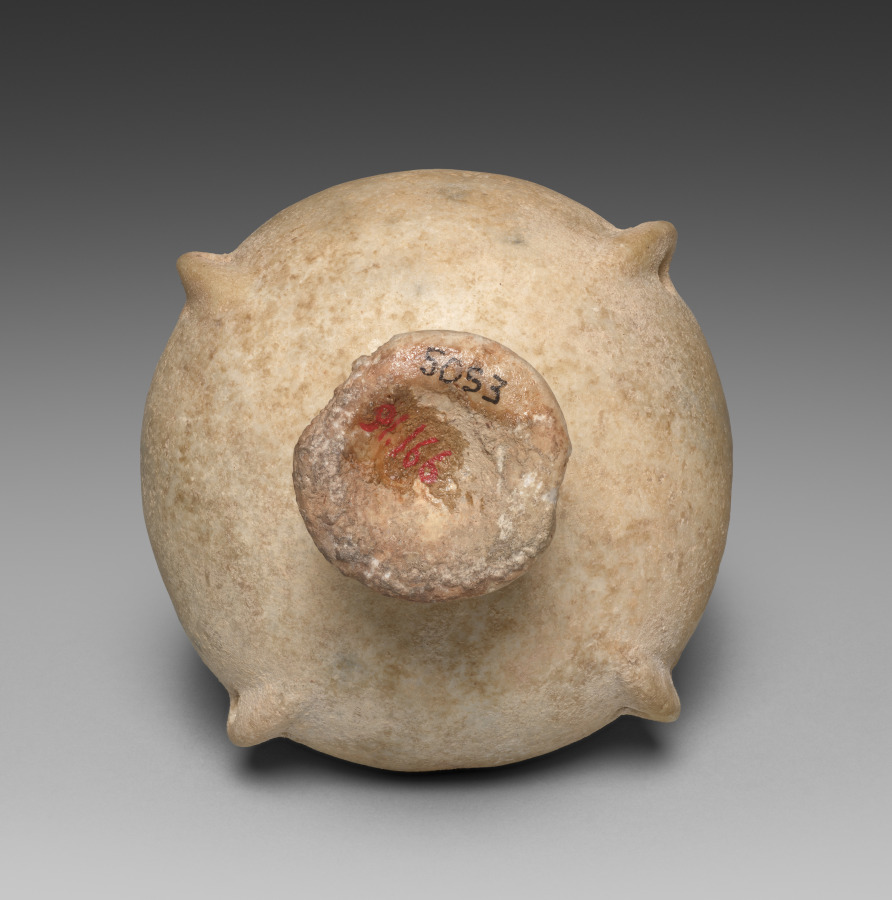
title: Kandila (Collared Jar with Conical Foot)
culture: Greece, Cycladic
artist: Master A (Greek)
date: 3000–2950 BCE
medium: marble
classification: Sculpture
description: Kandila, the modern Greek word used by archaeologists for Early Cycladic stone jars like this one, also refers to a type of hanging oil lamp, similar in shape but made of metal and still used in some Greek Orthodox churches. Despite this name and the formal similarity, the primary function of the prehistoric kandila remains uncertain. The holes drilled through each of its four lugs may have been used for hanging or to secure a lid.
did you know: "Cycladic" refers to a group of Aegean islands where vessels like this were made.